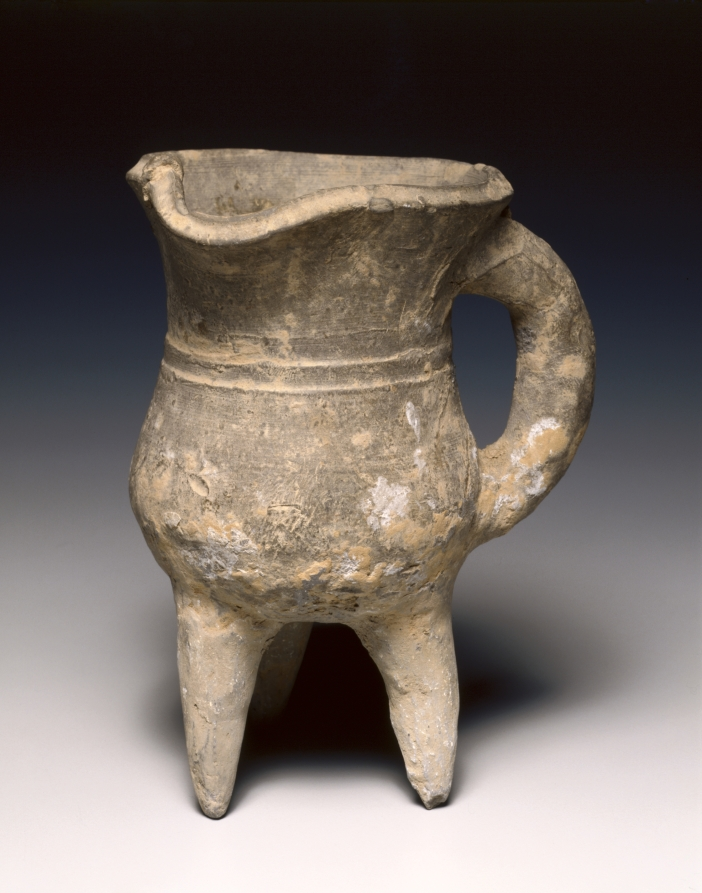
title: Wine Warmer (Jue)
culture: China, Shang dynasty (c. 1600–c. 1046 BCE), Anyang phase (c. 1250–1046 BCE)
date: c. 1300–1023 BCE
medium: pottery, tripod vessel with loop handle and rudimentary bowstring decoration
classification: Ceramic